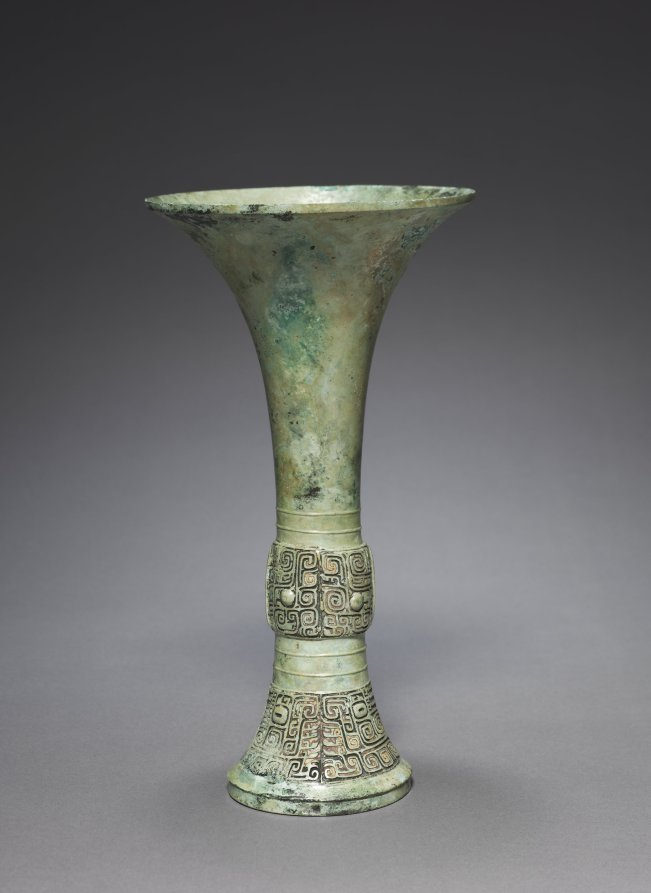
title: Wine Beaker (Gu)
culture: China, Shang dynasty (c. 1600–c. 1046 BCE), Anyang phase (c. 1250–1046 BCE)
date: c. 1200 BCE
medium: bronze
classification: Metalwork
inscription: cast on outside: "Ch'i (?) fu Chi."